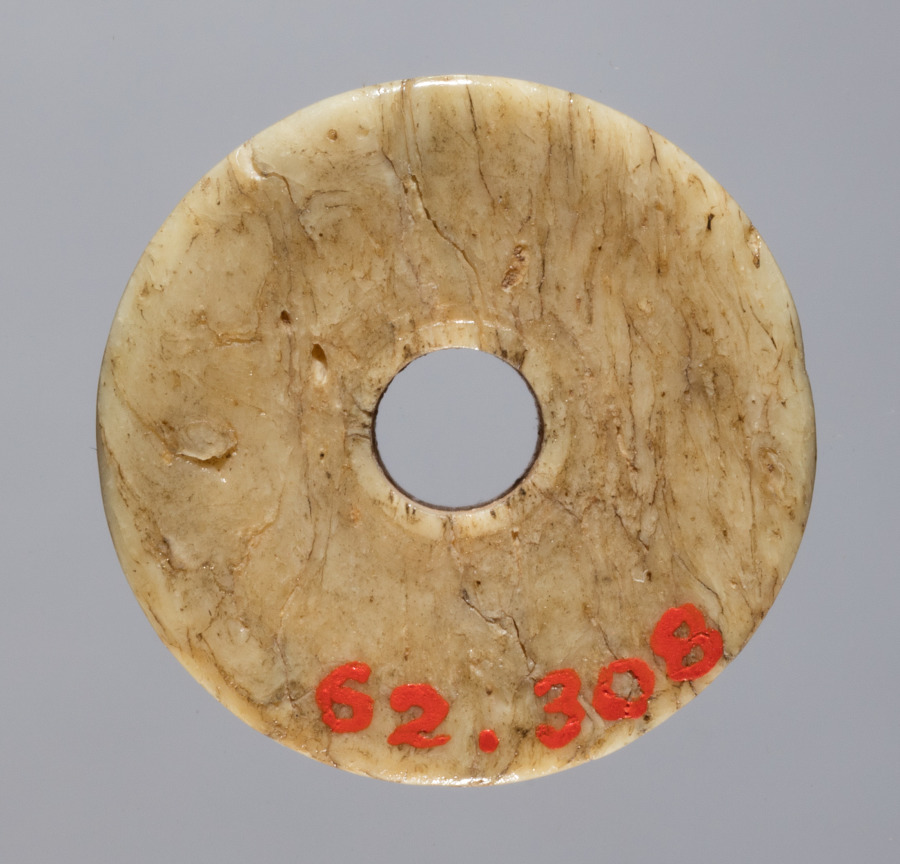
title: Spindle Whorl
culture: Iran, early Islamic period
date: 700s - 900s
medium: bone, incised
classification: Spindle Whorl